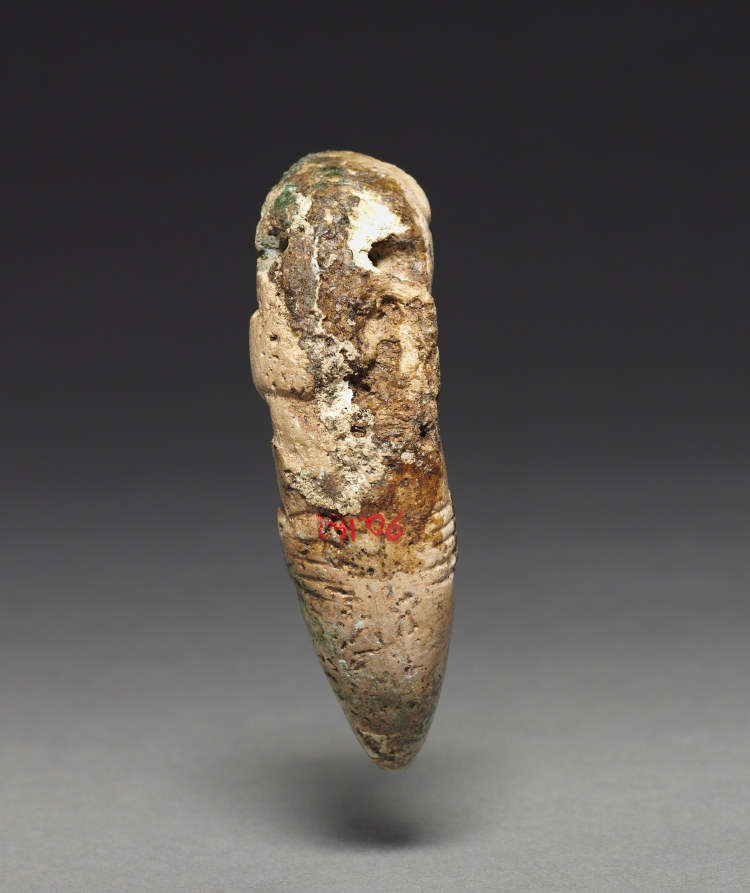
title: Reptile Pendant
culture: Central Panama, (Azuero Peninsula), c. 700-1550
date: c. 700–1550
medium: limestone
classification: Sculpture